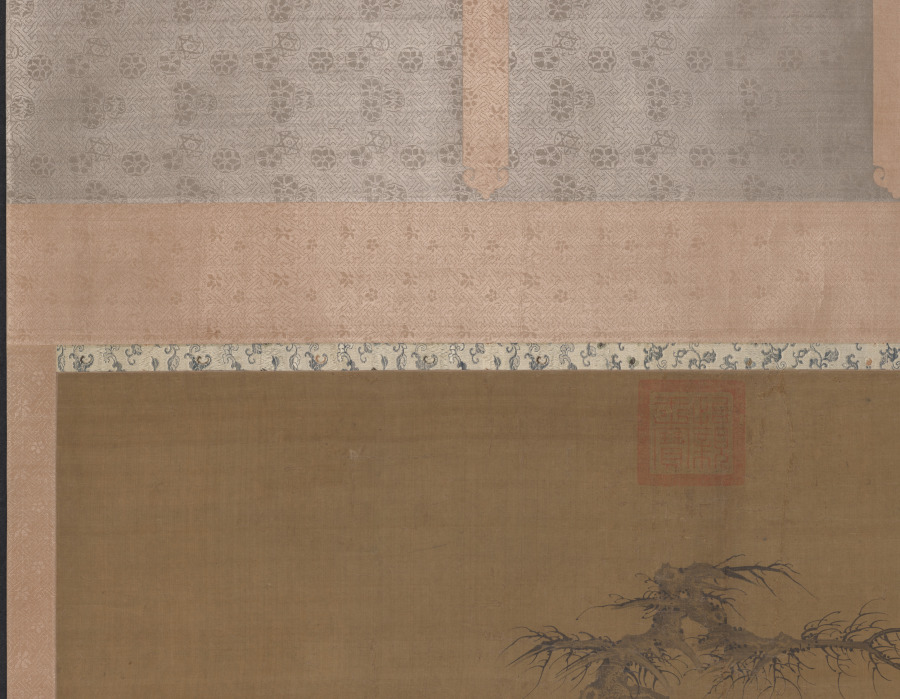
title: Old Trees by a Cool Spring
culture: China, Yuan dynasty (1271-1368)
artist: Li Shixing (Chinese, 1283–1328)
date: 1326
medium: hanging scroll; ink on silk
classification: Painting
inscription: 泰定丙寅年冬十二月薊丘李士行遵道作。[印] 李士行印; 李氏遵道; 遊戲翰墨.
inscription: 薊丘李侯能畫松，蟠根錯節騰蛟龍。 枯梢削鐵歲月古，細葉當風紫翠重。 昔人曾入子固夢，此株豈為秦官封。 畢宏韋偃偕已矣，請公放筆吾將從。 華溪九十翁沈夢麟書 蘊中上人題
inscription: [印] 明善堂所見書畫印記; [印] 怡親王寶